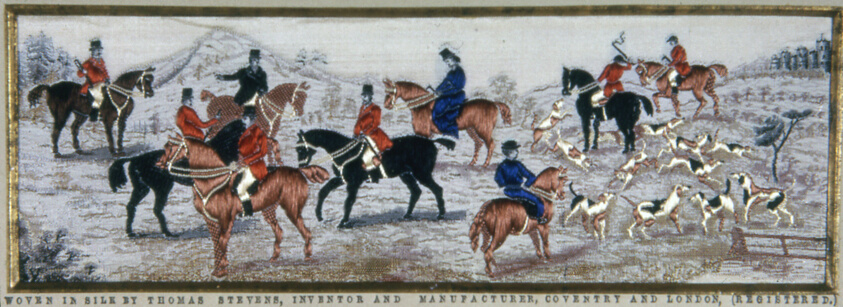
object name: Textile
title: "The Meet (A Hunting Scene)"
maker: Woven by Thomas Stevens (English, 1828–88); Coventry, England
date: 19th century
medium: Silk, plain weave with supplementary brocading wefts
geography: Coventry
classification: textile; weaving